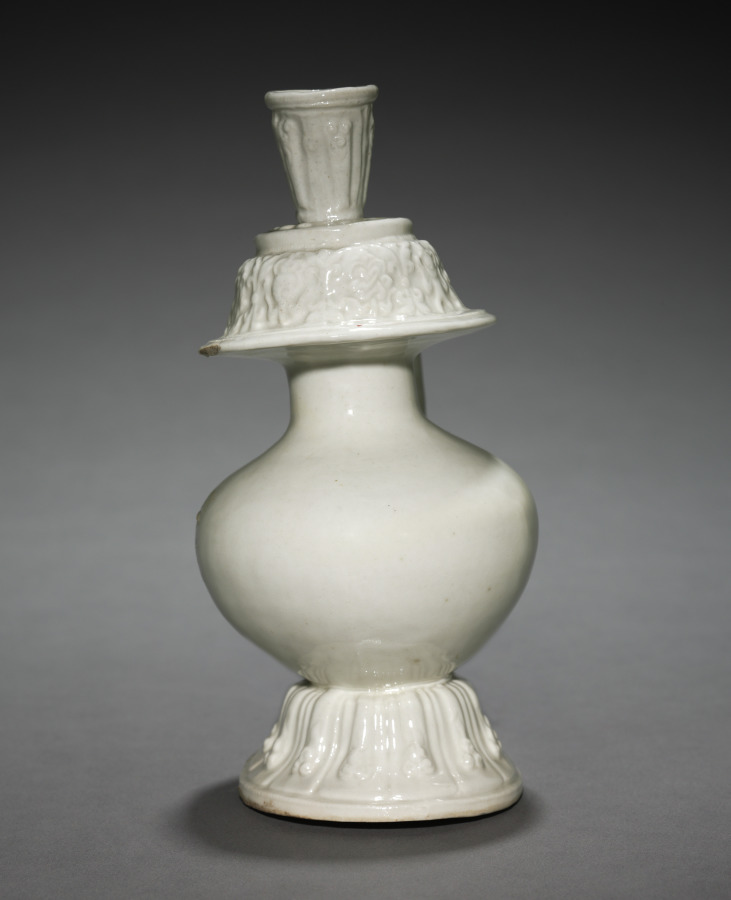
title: Ewer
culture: China, Yuan dynasty (1271-1368) - Ming dynasty (1368-1644)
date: 1300s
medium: porcelain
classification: Ceramic